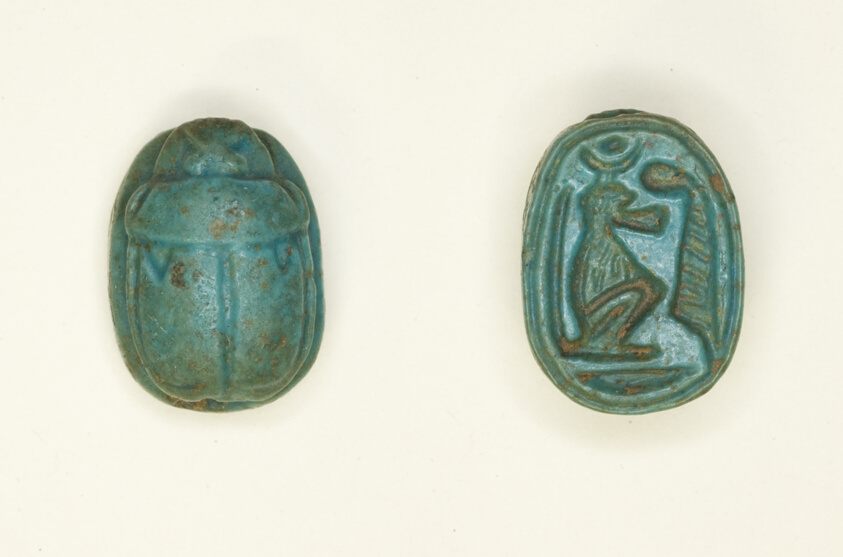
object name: Costume and Accessories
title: Scarab: Baboon with Ma’at Feather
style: new kingdom, ancient, egyptian, eighteenth dynasty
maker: Egyptian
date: New Kingdom, Dynasty 18 (about 1550–1295 BCE)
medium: Faience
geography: Egypt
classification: scarab; ancient art; costume; faïence (composite material)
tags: baboon, Hieroglyphs, feathers, insects